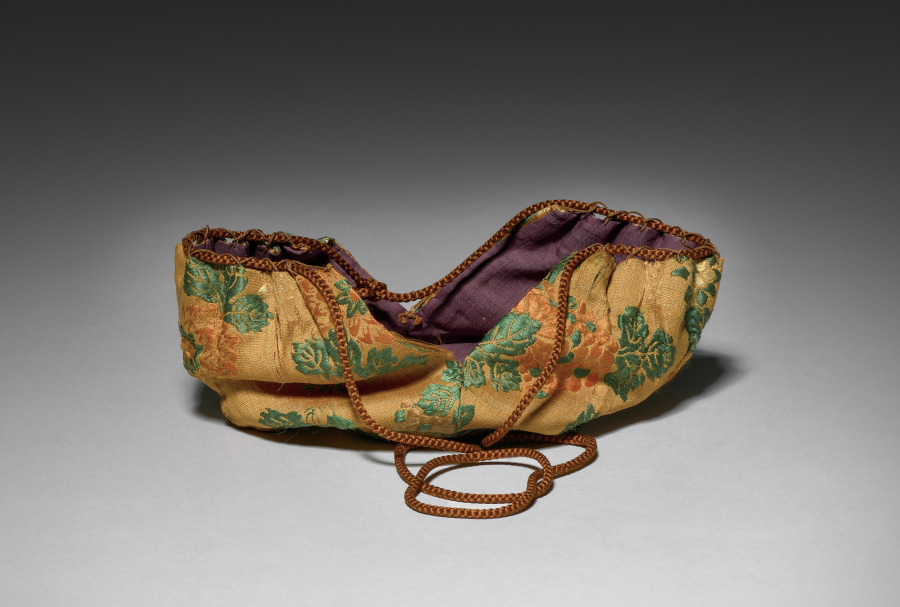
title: Clog-shaped Teabowl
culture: Japan, Momoyama period (1573–1615)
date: early 1600s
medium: Glazed stoneware (Mino ware, Oribe type)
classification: Ceramic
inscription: Mark: cross on base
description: Tea gatherings are fundamental to Japanese culture. Teabowls like this one are the most important objects used in tea practice. Its oblong shape and bold abstract designs are the signature style of the time period in which it was produced. That style is called Oribe, named for the tea master who championed the aesthetic.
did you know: Oribe is a government position. It means the person in charge of textiles.